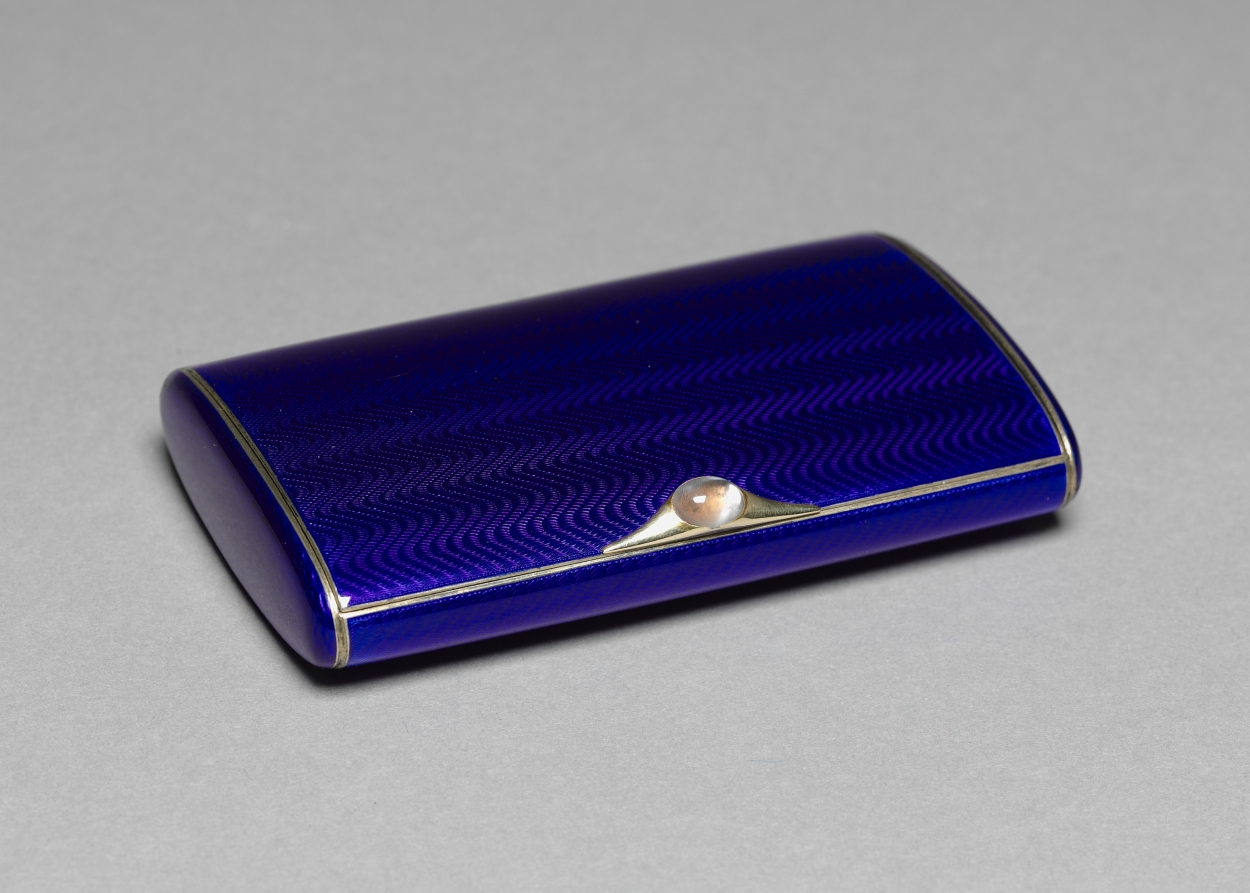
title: Cigarette Case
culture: Russia, St. Petersburg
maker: House of Fabergé (Russian, 1842–1918)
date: 1896–1903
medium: silver gilt, enamel over engine-turned ground, moonstone set in gold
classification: Miscellaneous